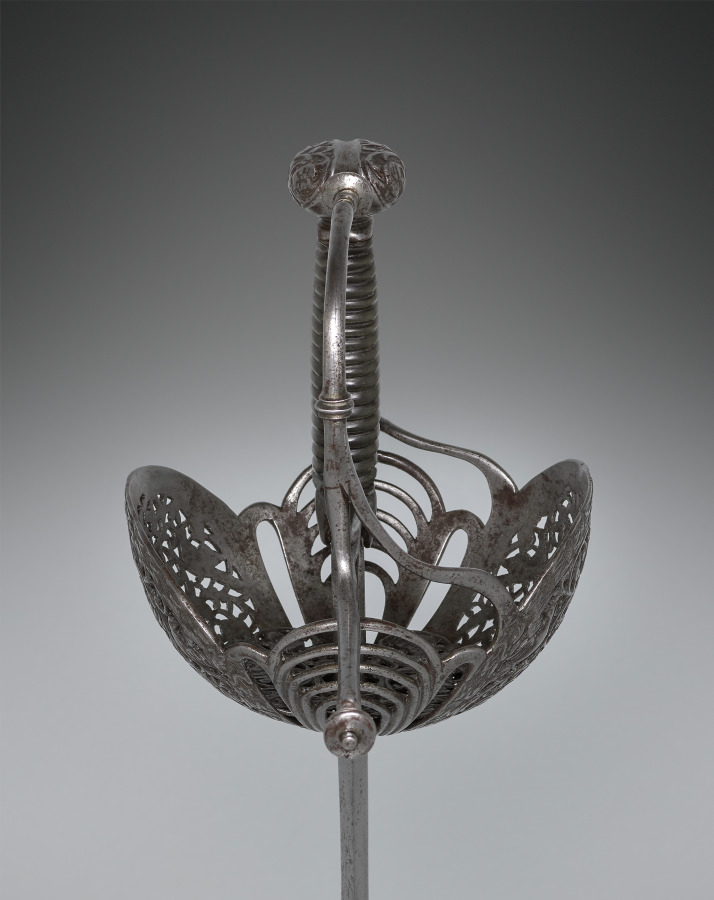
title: Rapier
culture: Spain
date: c. 1650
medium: steel, pierced and chiseled, leather and wood grip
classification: Arms and Armor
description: The rapier was a sword worn with civilian dress and used in duels. The term rapier derives from a 16th-century French word rapière, which in turn derived from the Spanish espada ropera, or “dress sword.” The rapier was a light weapon with a straight double-edged and pointed blade that, with the development of the art of fencing in the 1500s and 1600s, gradually became narrower and lighter, and thus suitable for thrusts only. With the new technique of swordplay emphasizing the point of the blade, sword guards became more complex to protect the duelist’s unarmored hand. These elaborate guards were frequently decorated by various techniques—chiseling, bluing, russeting, and damascening.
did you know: Many civilians wore swords for self defense and for settling disputes by dueling; the swords often reflected contemporary taste and fashion.